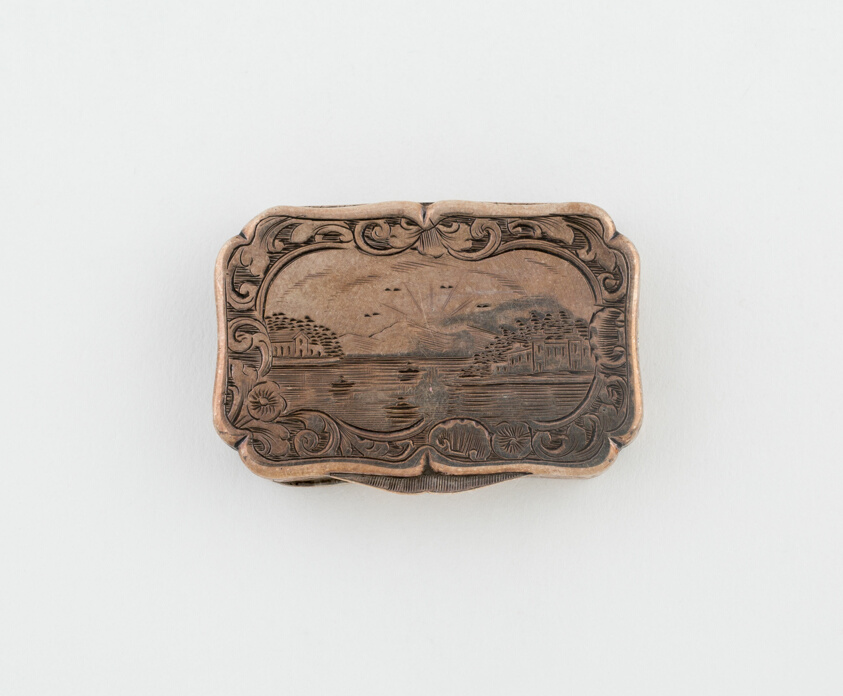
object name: Metalwork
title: Vinaigrette with Harbor Scene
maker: George Unite; Birmingham, England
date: 1846/47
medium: Silver and silver gilt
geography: Birmingham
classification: container for personal use; vinaigrette (container for health care); european decorative arts; metalwork; silver; decorative object/ornament